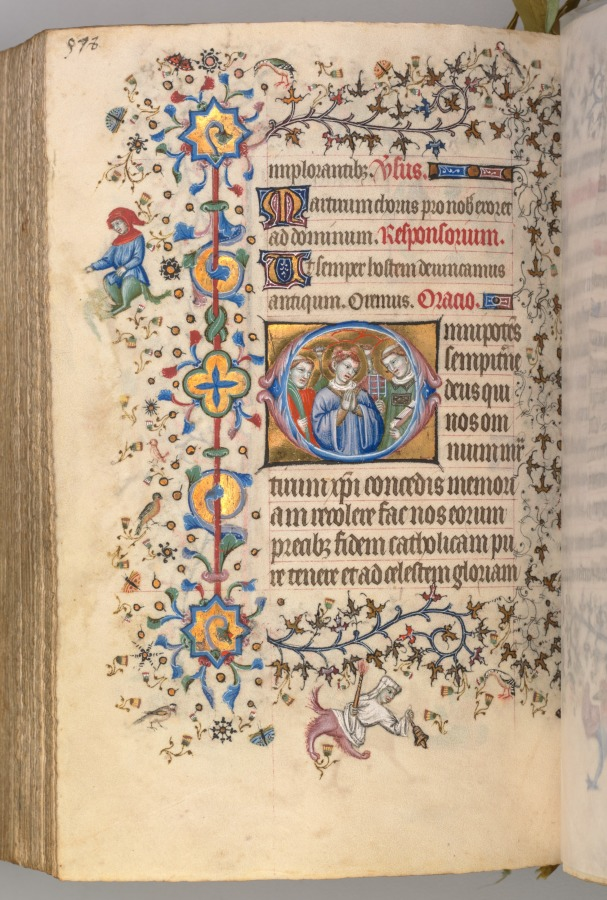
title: Hours of Charles the Noble, King of Navarre (1361-1425): fol. 283v, Martyrs: Unidentified Saint, SS. Stephen and Lawrence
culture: France, Paris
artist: Master of the Brussels Initials and Associates (French)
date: c. 1405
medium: ink, tempera, and gold on vellum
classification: Bound Volume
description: This precious volume was obviously highly prized by its owner, the French-born King of Navarre, who had his coat of arms painted on no less than twenty folios. Rather than directly commissioning this manuscript from a specific workshop, it seems that Charles the Noble acquired his book of hours -- perhaps ready-made for the luxury market -- while on a trip to Paris in 1404-05. A collaborative effort, six painting styles are evidenced within the pages of this codex, those of two Italians, two Frenchmen, and two Netherlanders. The painter who was responsible for the planning and decoration of the book, and who produced seventeen of the large miniatures, was a Bolognese artist known as the Master of the Brussels Initials. His principal assistant, responsible for most of the borders, was a Florentine who signed his name "Zecho" da Firenze on folio 208 verso.